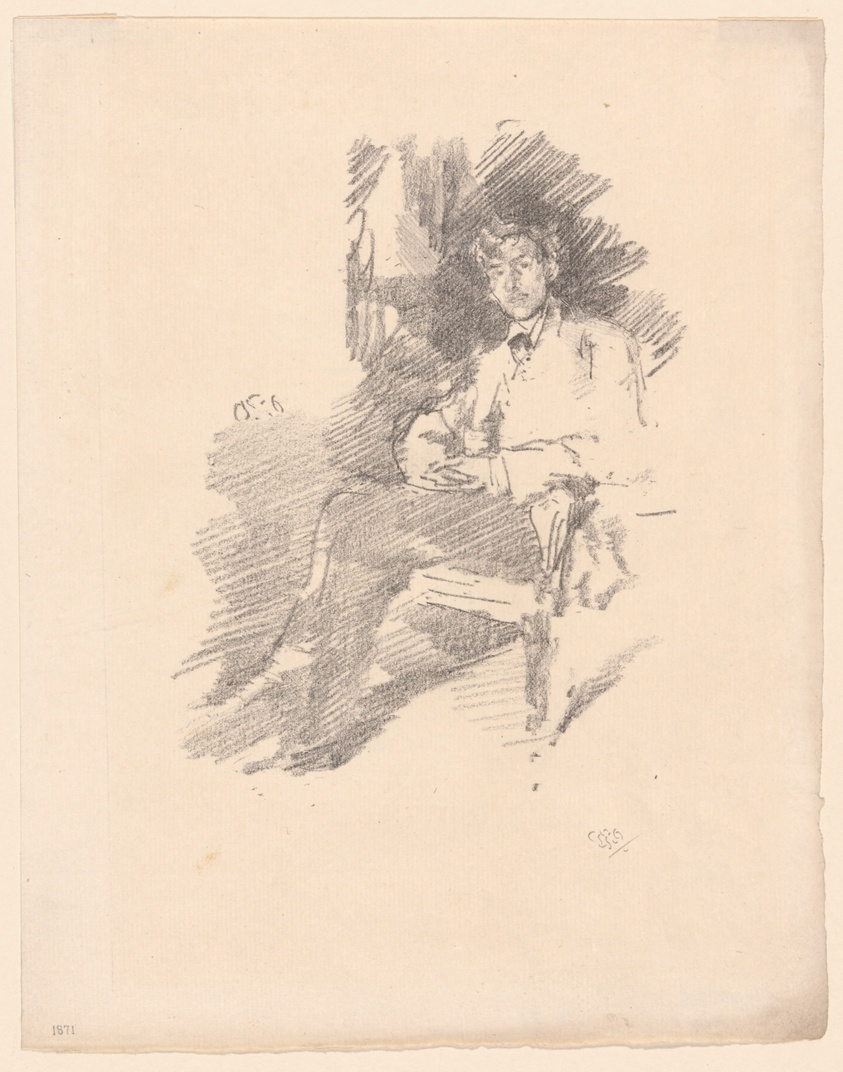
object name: Print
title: Walter Sickert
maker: James McNeill Whistler (American, 1834-1903)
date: 1895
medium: Transfer lithograph in black on ivory laid paper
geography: United States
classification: transfer lithograph; lithograph; print; prints and drawing; paper